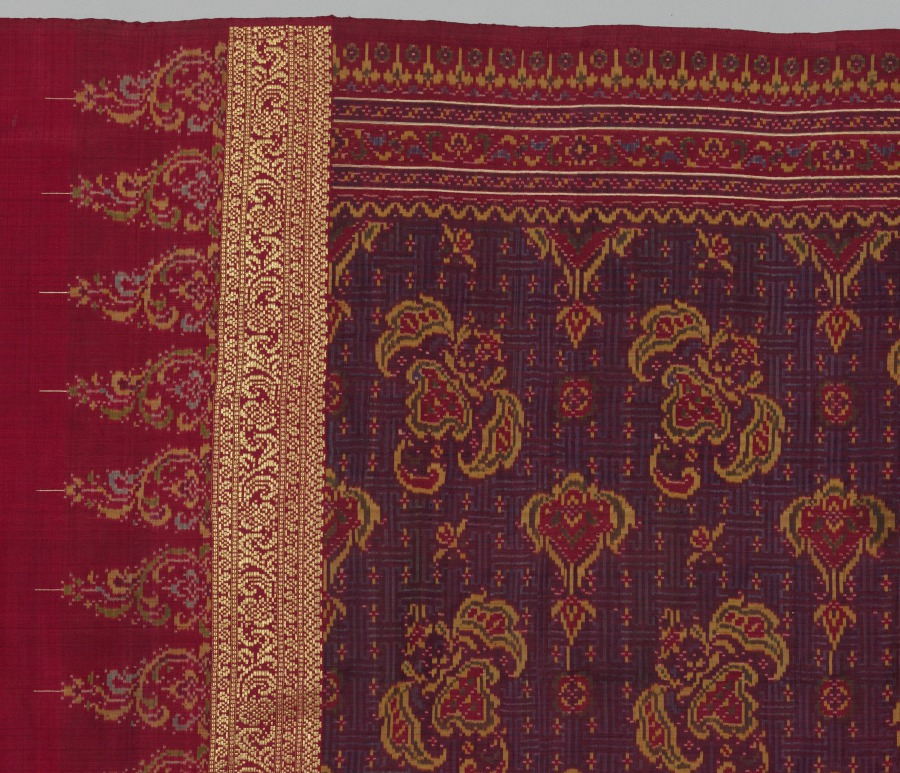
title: Shoulder Cloth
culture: Indonesia, Sumatra, Palembang, 19th century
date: 1800s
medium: weft ikat and gold, tabby weave, brocaded; silk and gold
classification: Textile